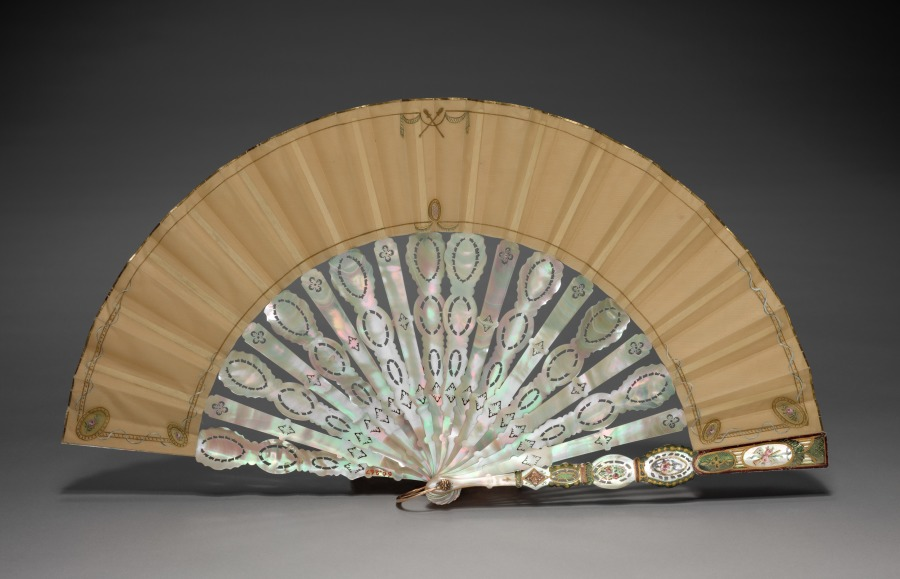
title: Fan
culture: France, late 19th century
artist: Marie Gallois (French)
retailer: Tiffany & Co. (America, New York, est. 1837)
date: c. 1850–1870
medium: Leaf: gouache on paper; sticks and guards: mother-of-pearl; pivot: gold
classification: Miscellaneous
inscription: central medallion signed: "Gallois."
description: This folding fan decorated with figures in 18th-century costume dancing, playing music, and flirting exemplifies the Rococo revival in America. In response to widespread urbanization and the spread of manufacturing, wealthy members of American society embraced styles and subjects of the past such as the fête champêtre (outdoor entertainment). This luxurious, handmade object denounces the mechanization of mass production.